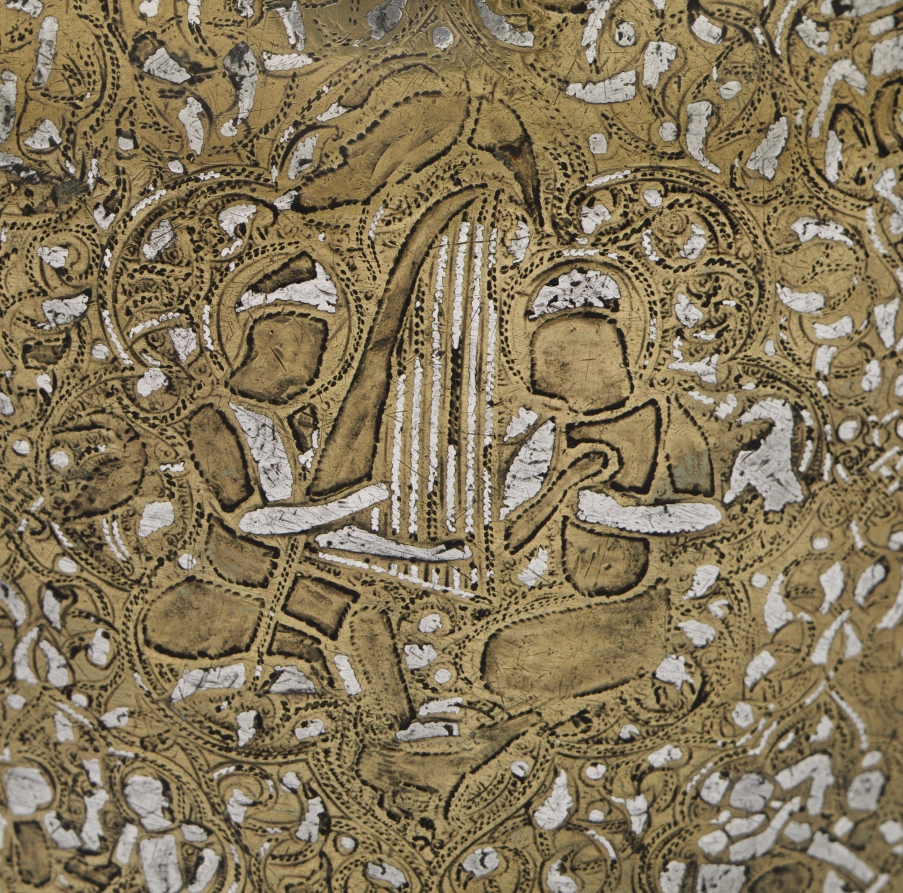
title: Luxury Ewer Extending Good Fortune to the Owner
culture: Iraq, possibly Mosul, Zangid or Artugid Period, 13th Century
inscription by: Ahmad al-Dhaki al-Mawsili (Iraqi, Mosul, active early 1200s?)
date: 1223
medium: brass inlaid with silver; lid and base added later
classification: Metalwork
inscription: Band on the neck (naskh): "Work of Ahmad al-Thaki, the engraver, al-Mawsili, in the year 620 and glory to my owner"; band at the base of the handle (naskh): "Work of Ahmad al-Thaki al-Mawsili"; graffiti of later owners, roughly scratched into the neck of the ewer: "Husayn ibn Qasim"; "Usta al-Muhtasib [?]"; band on the shoulder of the ewer (plaited, animated kufic): "Good luck, and learning, and commanding respect, and prosperity, and pride, and generosity, and faithfulness, and affection, and glory, and survival, and justice, and blessings, and exaltedness, and prosperity, and everlasting peace, and charitable giving."; band on the foot (naskh) [foot is a later addition]; this inscription has not yet been deciphered.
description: This silver inlaid ewer was produced for luxury clientele. The wide band around the body of the vessel displays vignettes of daily and courtly life contained within multilobed medallions. Some of the scenes feature falconry, hunting, dancing, and several groups of musicians. All these scenes are set off against a skillfully executed arabesque background—a pervasive motif in Islamic art characterized by interwoven vegetal and curvilinear elements. An inscription around the ewer’s shoulder extends good fortune, prosperity, and peace to the owner. The ewer is dated 1223 and signed by the master craftsman Ahmad al-Dhaki of Mosul.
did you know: Later owners roughly scratched their names into the neck of the ewer.